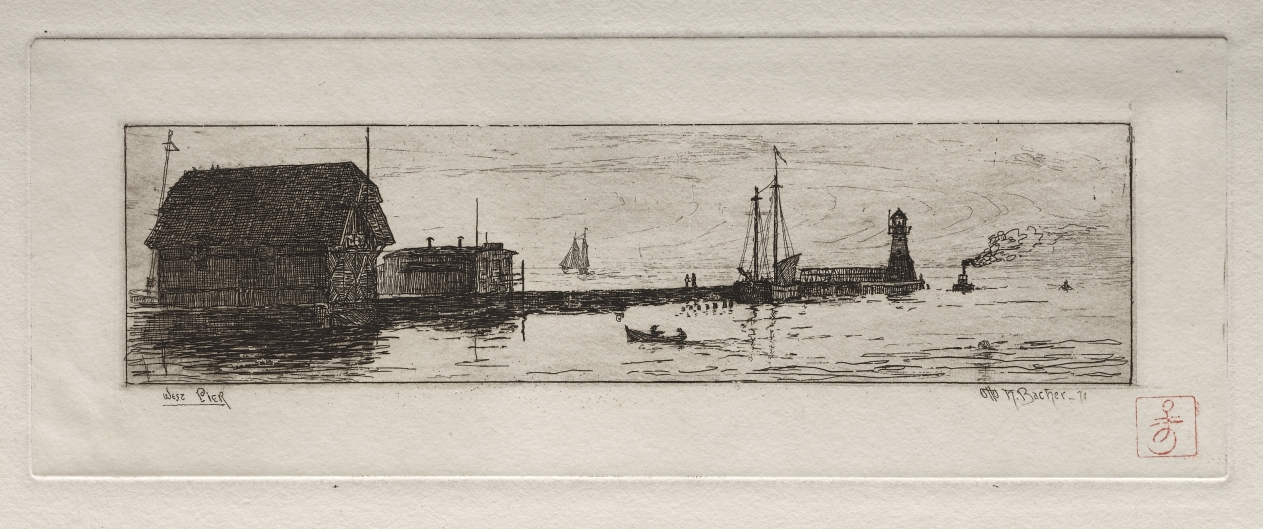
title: West Pier, Cleveland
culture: America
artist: Otto H. Bacher (American, 1856–1909)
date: 1878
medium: etching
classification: Print